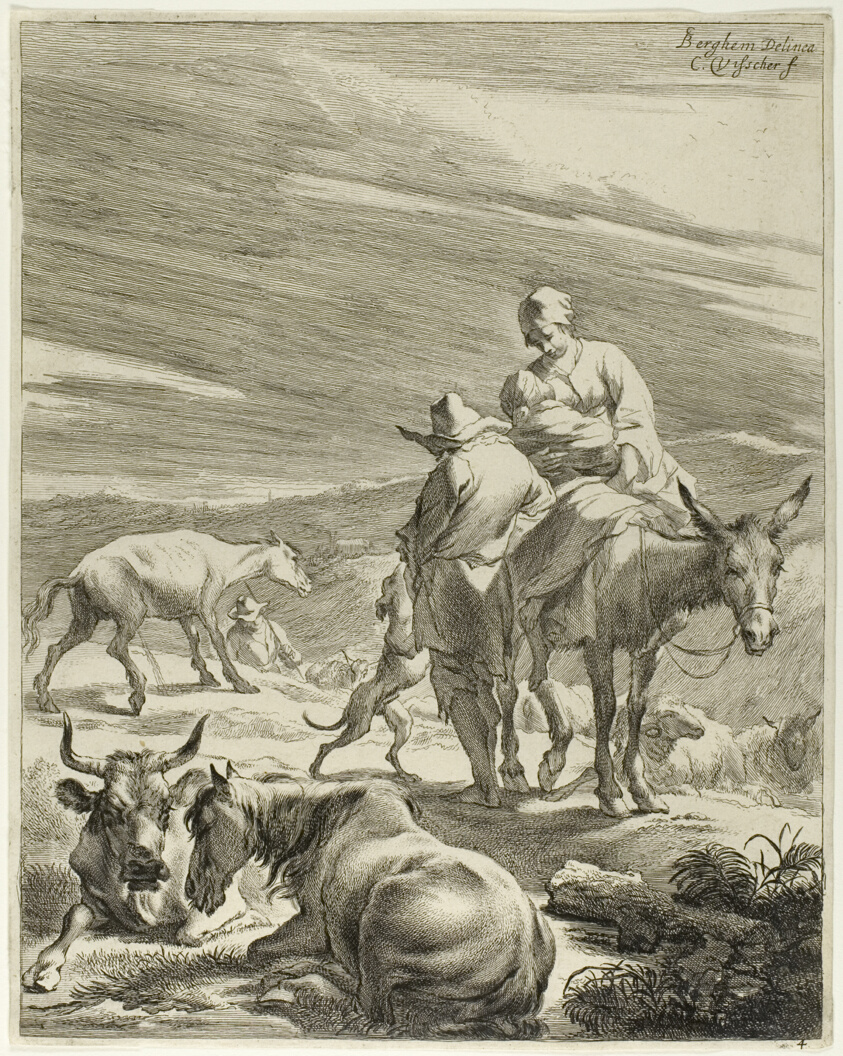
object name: Print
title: A Mother an Swathed Child Riding a Donkey, plate 4 from Four Landscapes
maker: Cornelis Visscher (Dutch, c. 1629-1658); after Nicolaes Berchem (Dutch, 1620-1683)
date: c. 1649-58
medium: Engraving on paper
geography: Holland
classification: engraving; print; prints and drawing